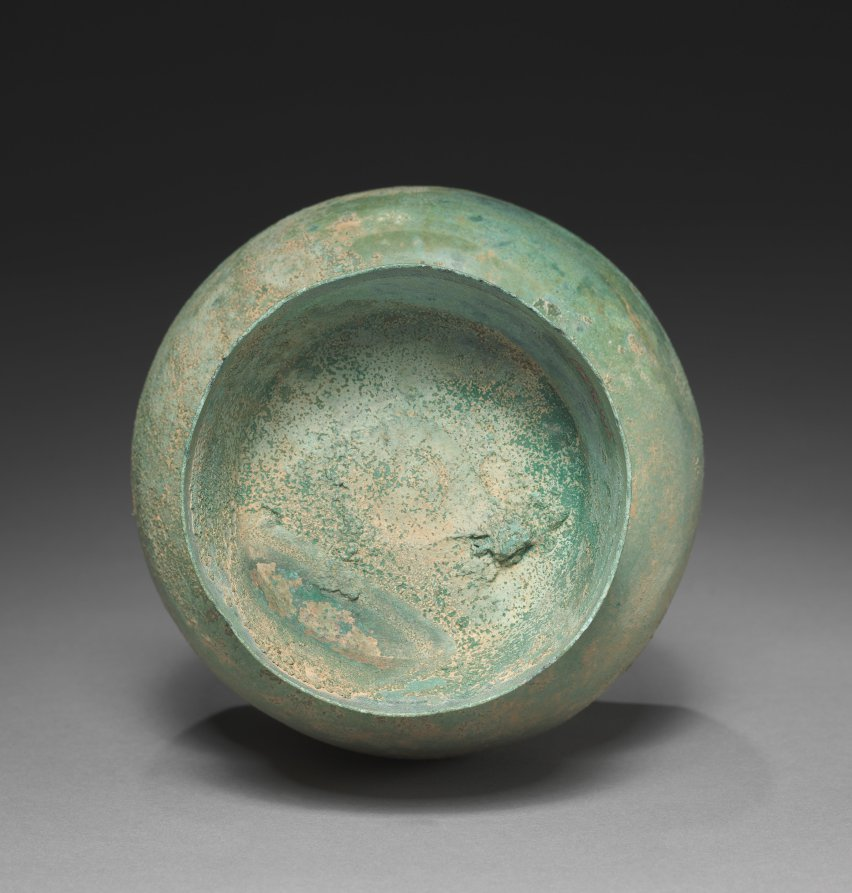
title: Wide-Mouthed Bottle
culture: Korea, Goryeo dynasty (918–1392)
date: 1100s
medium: bronze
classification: Metalwork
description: As early as the seventh century, the practice of drinking tea and wine became an important part of elite culture in Korea. Elites of the Goryeo period commissioned a variety of types of utensils and vessels made in both ceramic and bronze, including this handsome bronze wine bottle to make their drinking experience more exciting.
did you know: A bottle with a wide opening is one of the popular types for both bronze and celadon wares. Its ceramic counterpart is 1918.435.